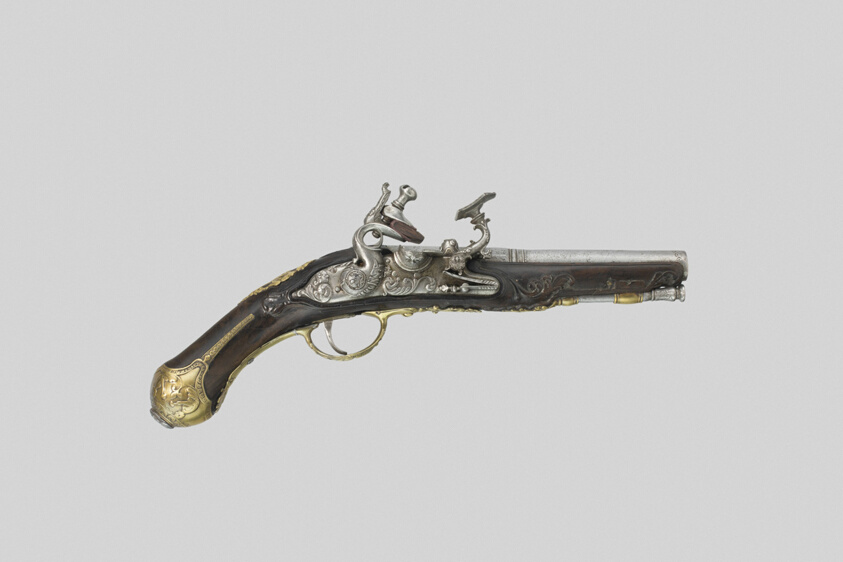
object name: Arms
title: Snaphance Belt Pistol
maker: Lock signed Domenico Guardiani; Italian, Anghiara, died after 1839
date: dated 1775, in style of c. 1700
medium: Steel, brass, walnut, and gold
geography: Italy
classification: firearm-handgun; arms; arms and armor